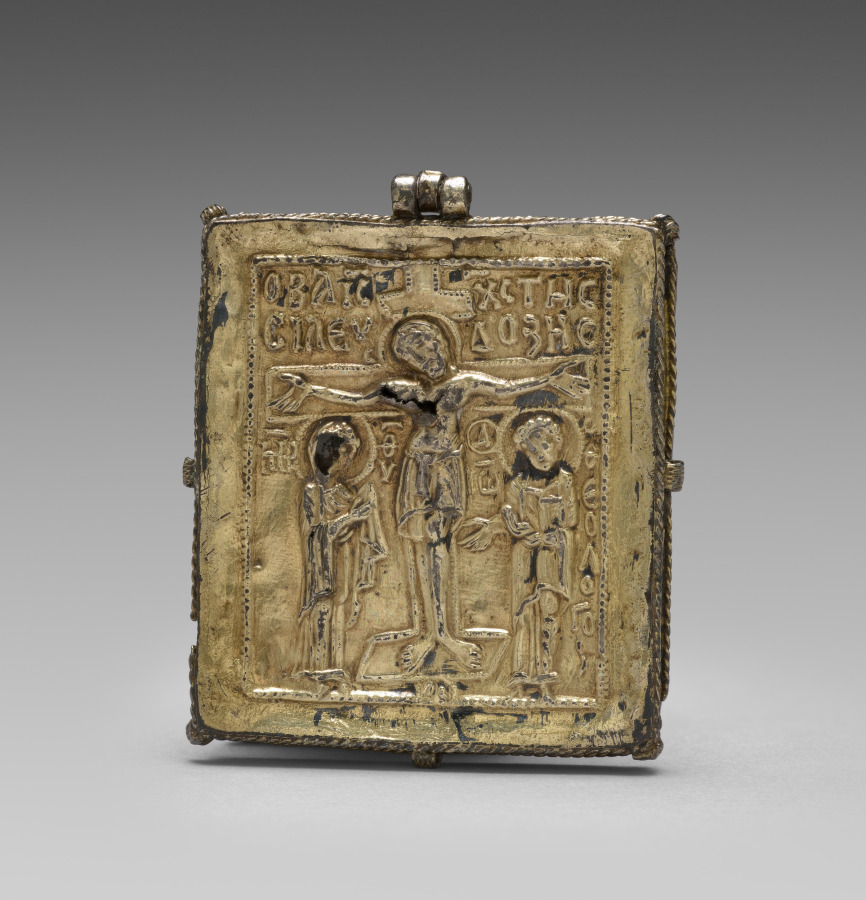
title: Enkolpion with the Crucifixion (front) and Saints Theodore and George (back)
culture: Byzantium, Constantinople, Byzantine period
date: 1080–1120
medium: silver gilt and cloisoné enamel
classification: Metalwork